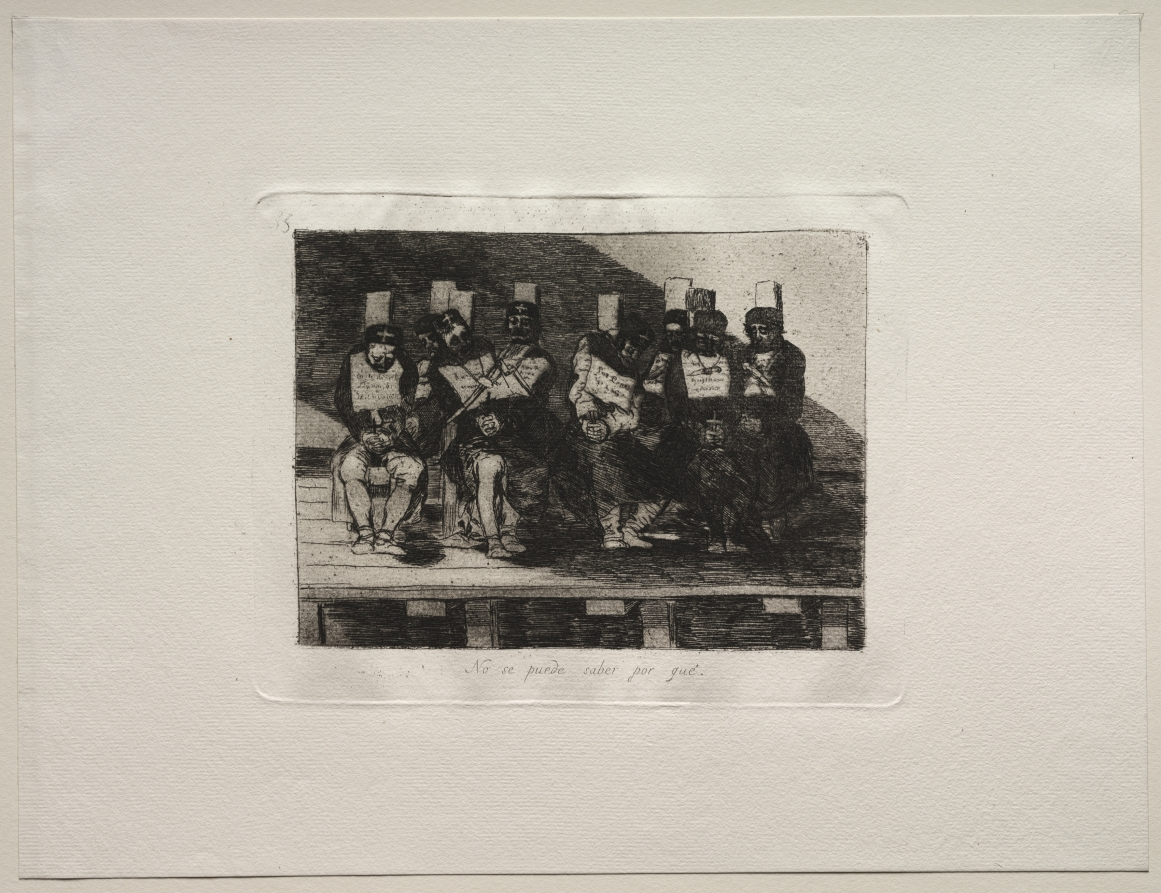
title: The Horrors of War: One Can't Tell Why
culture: Spain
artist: Francisco de Goya (Spanish, 1746–1828)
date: c. 1810–20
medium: etching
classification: Print